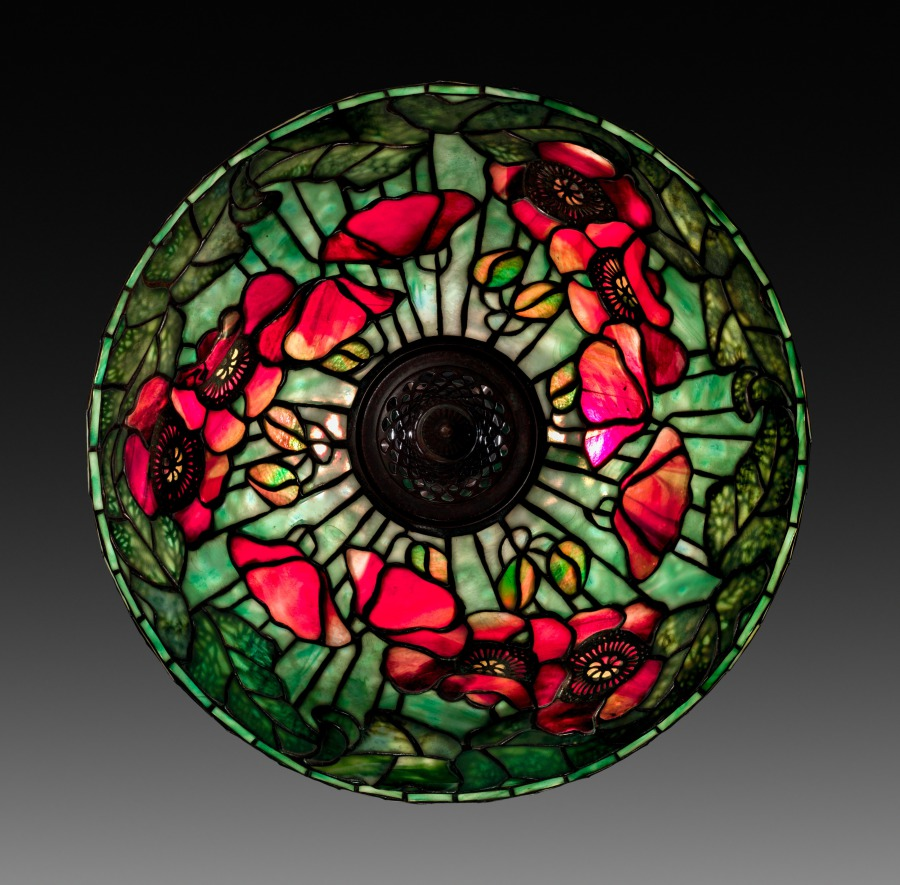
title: Poppy Filigree Table Lamp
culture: America, New York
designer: probably by Clara Wolcott Driscoll (American, 1861–1944)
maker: Tiffany Studios (United States, New York, 1902–32)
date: c.1902–10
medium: Leaded glass, blown glass, brass, bronze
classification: Lamp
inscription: Shade impressed: TIFFANY STUDIOS/NEW YORK/1431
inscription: Base impressed: TIFFANY STUDIOS/NEW YORK/28610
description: In the 1870s a renewed emphasis on natural landscapes ushered in a generation of cottage gardeners who delighted in planting perennials in large quantities. Louis Comfort Tiffany was among those who championed the lush, sometimes wild-looking displays of varied floral species in the garden at his Long Island estate, Laurelton Hall. Tiffany encouraged his designers to take inspiration from his garden by shipping fresh cuttings almost weekly to his studios. Ohio native Clara Wolcott Driscoll and her team of female designers created floral patterns for lamps and mosaics based on the colorful blooms of spring that became among the most sought after and commercially successful of Tiffany’s production.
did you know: Brass filigree layered over and underneath the glass in the Poppy lamp helps define its blossoms and leaves.